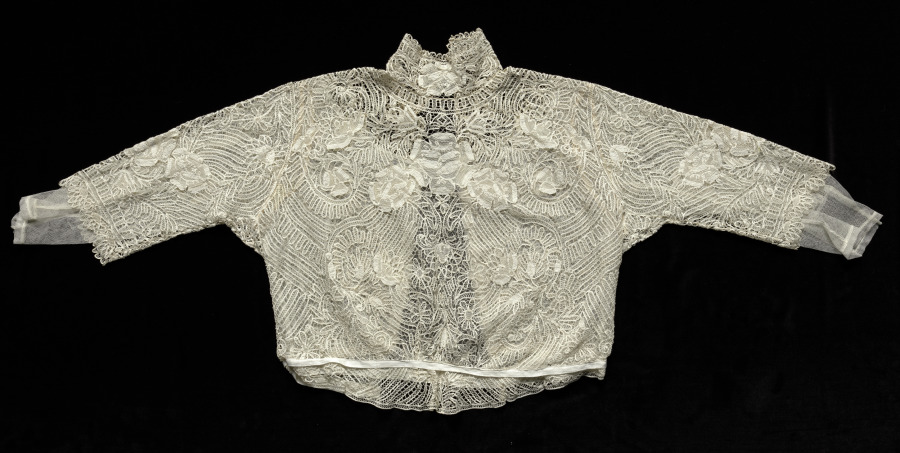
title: Lace Blouse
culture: Czechoslovakia, Bohemia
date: 1880–1948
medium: Linen: needle lace and bobbin lace (tape lace)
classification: Lace